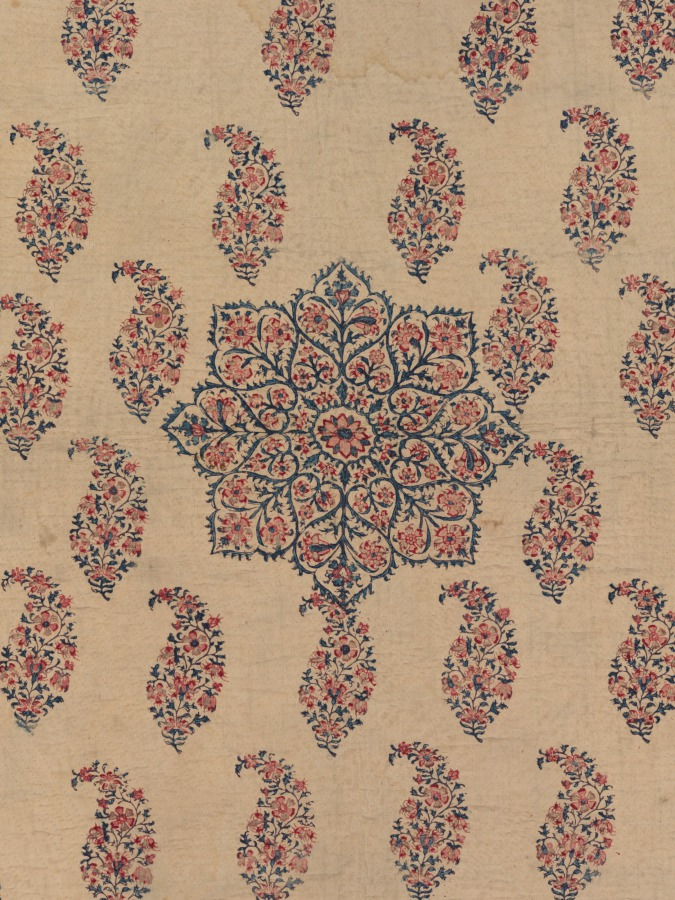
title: Prayer Mat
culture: India, early 19th century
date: early 1800s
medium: block printed and painted quilted cotton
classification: Textile